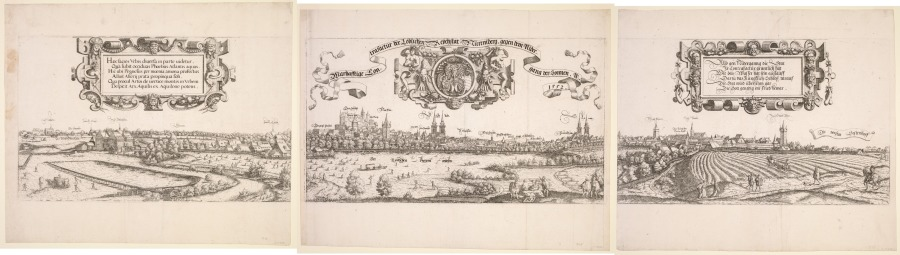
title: Panoramic View of Nuremberg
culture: Germany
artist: Hanns Lautensack (German, 1524–1566)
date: 1552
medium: etching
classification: Print